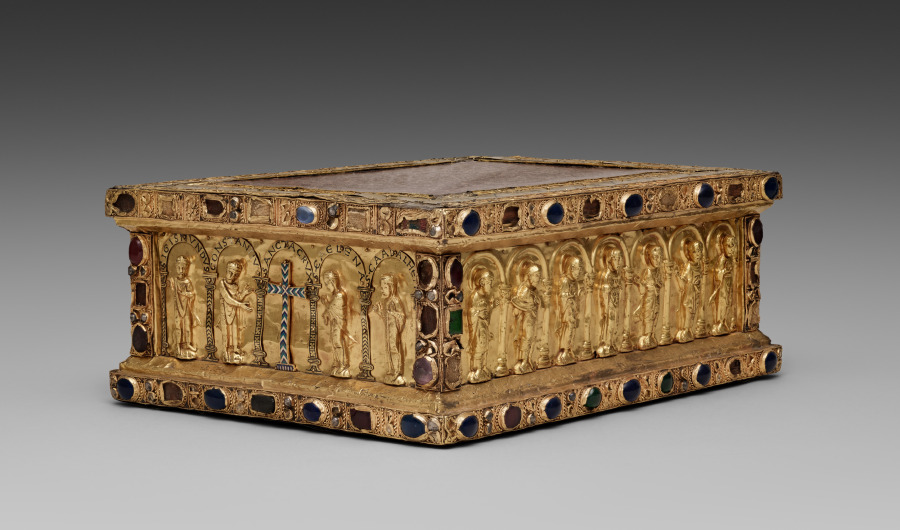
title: Portable Altar of Countess Gertrude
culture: Germany, Lower Saxony?, Romanesque period, 11th century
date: c. 1045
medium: gold, cloisonné enamel, porphyry, gems, pearls, niello, wood core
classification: Metalwork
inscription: GERDRVDIS XPO FELIX VT | VIVAT IN IPSO OBTVLIT HVNC LAPIDEM GEMMIS | AVROQ NITENTEM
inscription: SIGISMVNDVS, CONSTANTIVS, SANCTA CRVX, SCA ELENA, SCA ADALHEIT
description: Commissioned by Countess Gertrude of Brunswick, this portable altar is one of the Guelph Treasure’s earliest and most sumptuous objects. The choice of white-speckled porphyry as the altar stone signals Gertrude’s worldly aspirations; an imperial color since classical antiquity, porphyry was only used by the imperial family. Historical figures of royal and imperial rank are depicted with Christ, the Virgin, apostles, and archangels along the altar’s sides, stressing the countess’s political ambitions and claim of imperial lineage for her own dynasty. The Latin inscription surrounding the altar stone reads, "Gertrude offers to Christ, to live joyfully in him, this stone that glistens with gems and gold."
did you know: On the bottom of this altar is a trap door that opened to reveal small relics of saints wrapped in silk.